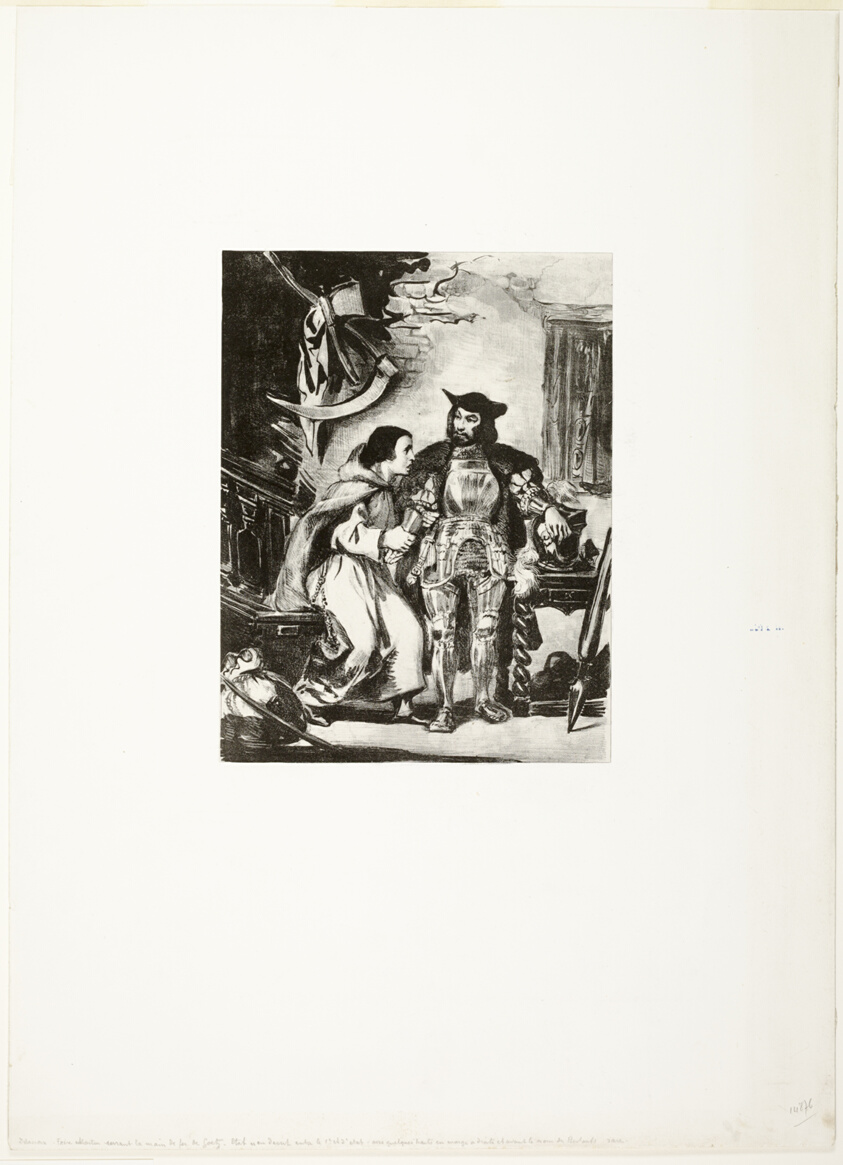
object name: Print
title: Brother Martin Clasping the Iron Hand of Goetz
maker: Eugène Delacroix (French, 1798-1863)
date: 1836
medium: Lithograph in black on ivory China paper laid down on white wove paper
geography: France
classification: lithograph; print; prints and drawing